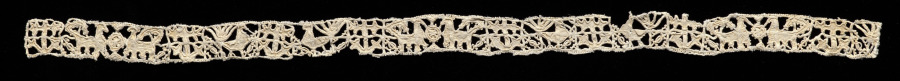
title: Lace Fragment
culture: Italy, 1600-1640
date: 1600–1640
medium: Linen: needle lace (reticella)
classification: Lace